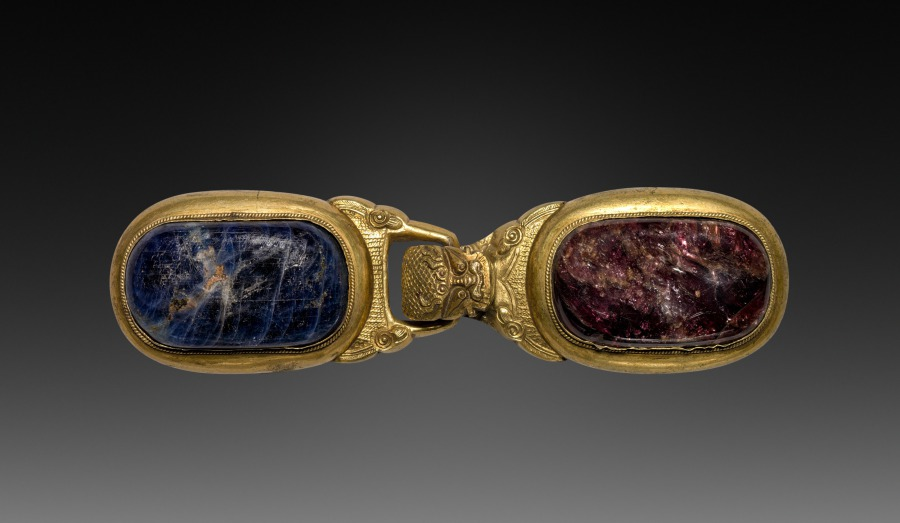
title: Buckle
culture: China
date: 1900s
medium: gilt brass set with quartz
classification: Jewelry